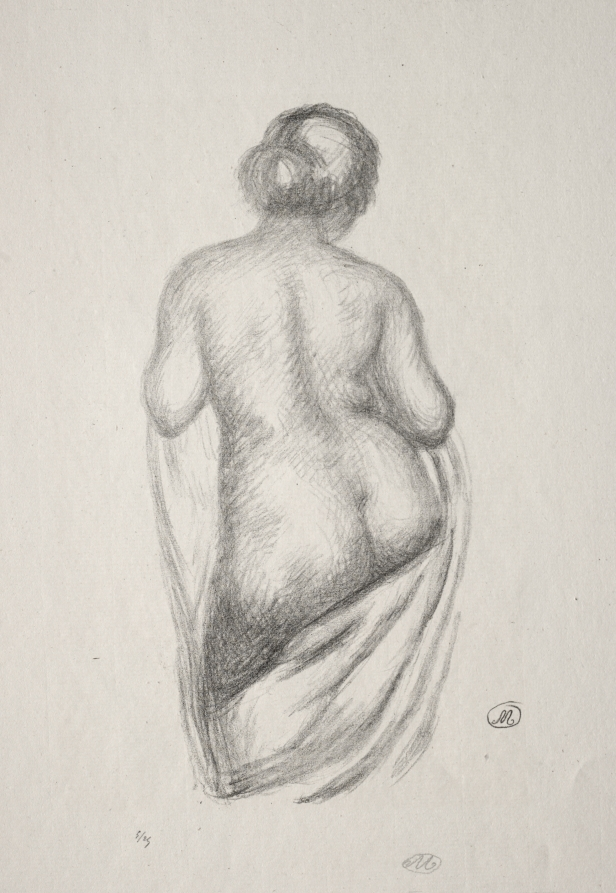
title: Nude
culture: France, 20th century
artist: Aristide Maillol (French, 1861–1944)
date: c. 1900–1941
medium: lithograph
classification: Print